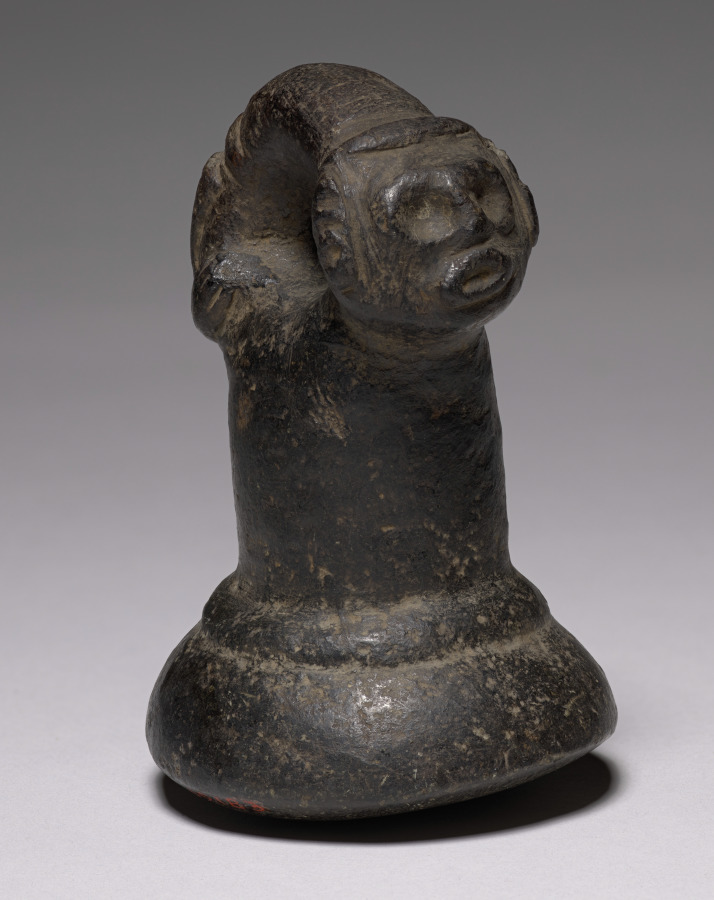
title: Pestle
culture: West Indies, Arawak (?), 15th century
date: 1400s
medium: stone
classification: Sculpture